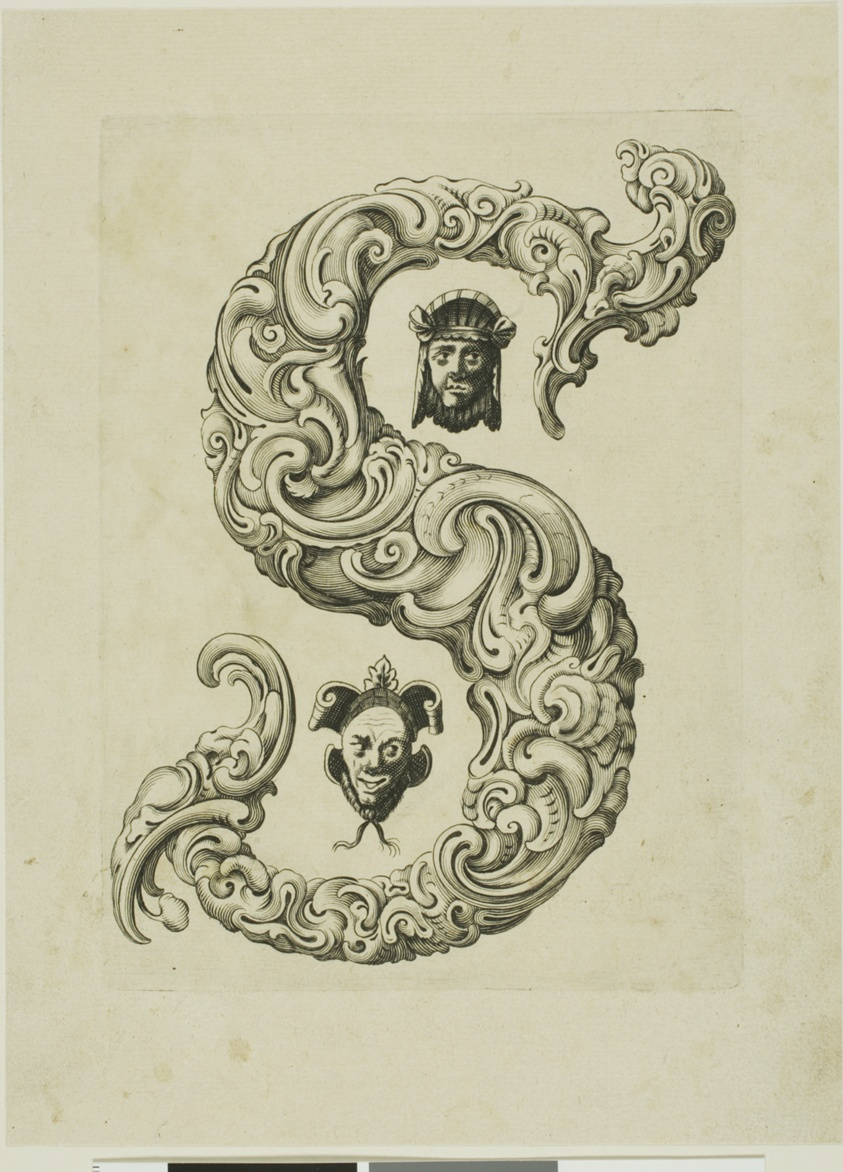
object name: Print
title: Letter S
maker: Peter Aubry (German, 1596-1668)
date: 1630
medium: Engraving on paper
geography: Germany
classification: engraving; print; prints and drawing